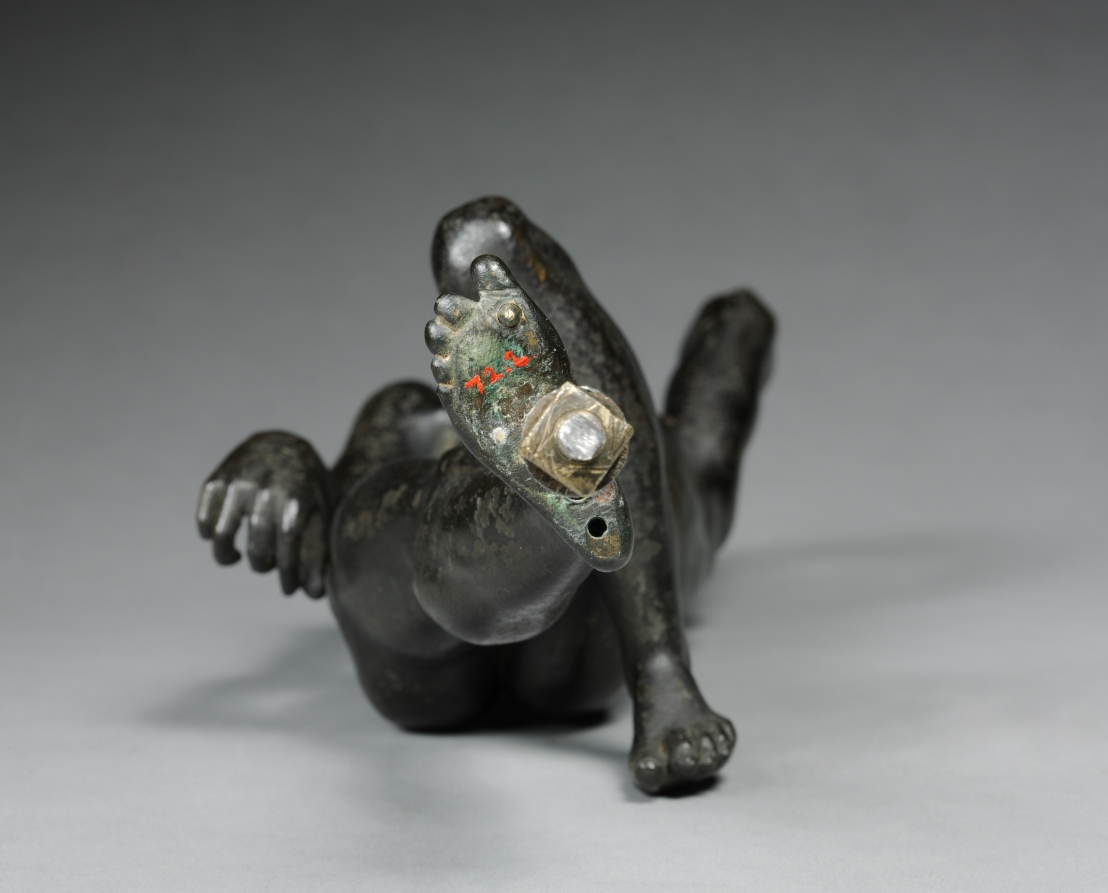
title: Saint Sebastian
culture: Germany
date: 1600s or later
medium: bronze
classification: Sculpture